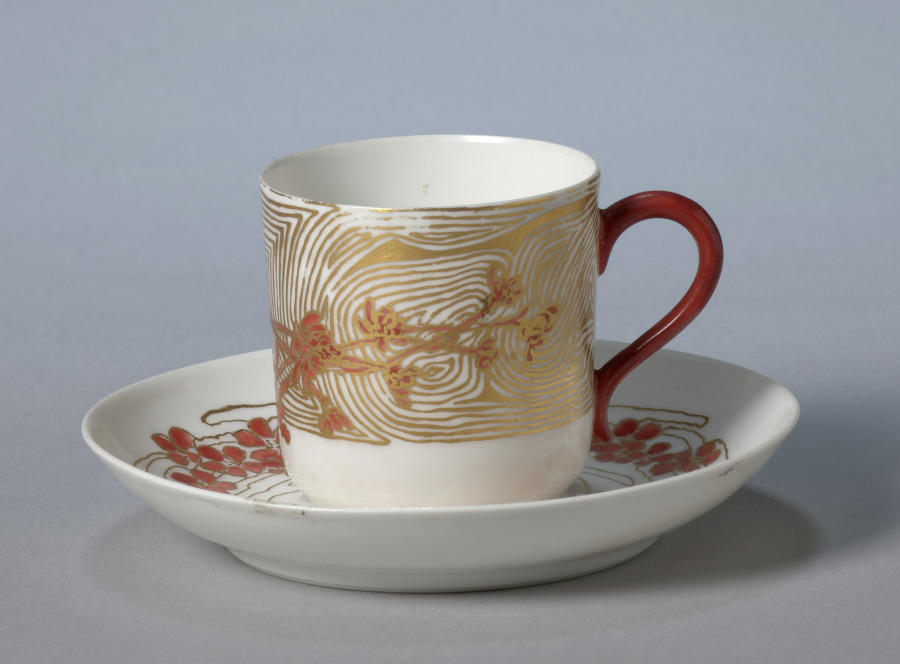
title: Cup and Saucer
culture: America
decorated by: M. Louise McLaughlin (American, 1847–1939)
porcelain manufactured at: Haviland & Co. (French)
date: 1888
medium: porcelain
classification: Ceramic